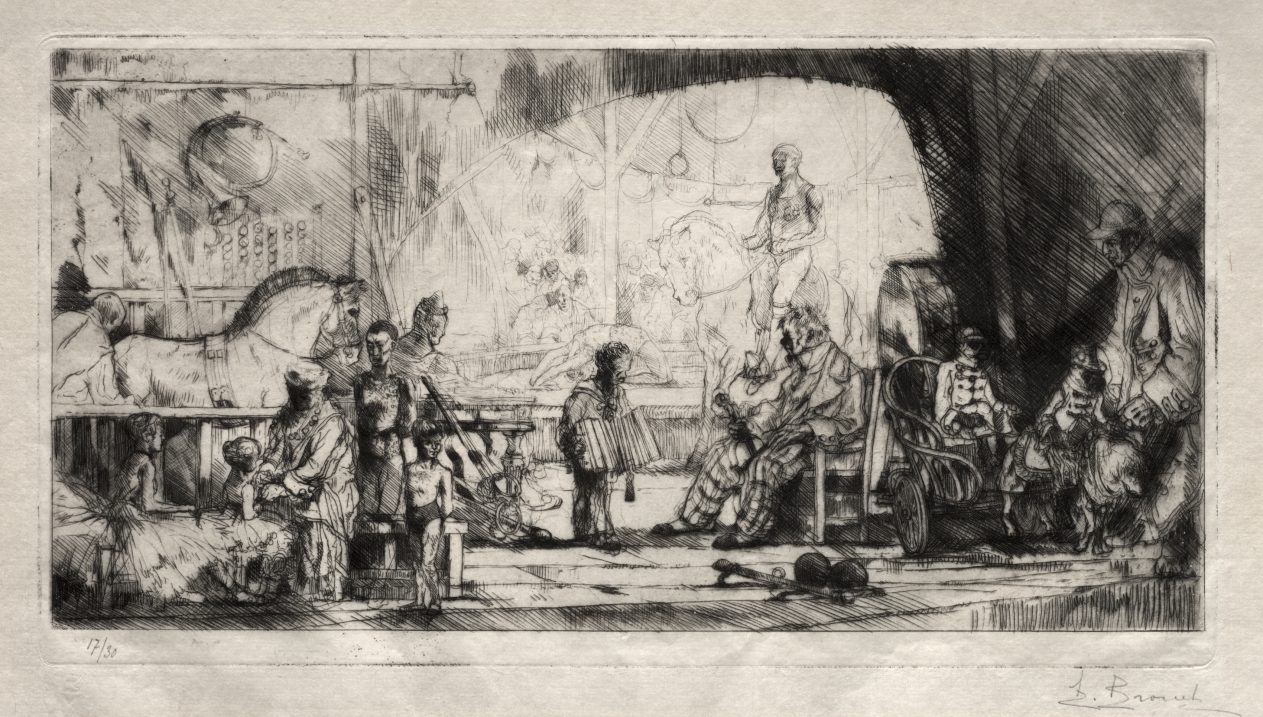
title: The Pinder Circus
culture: France, 20th century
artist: Auguste Brouet (French, 1872–1941)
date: c. 1902–41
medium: etching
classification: Print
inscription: in graphite, lower left: 17/30; lower right: A. Brouet